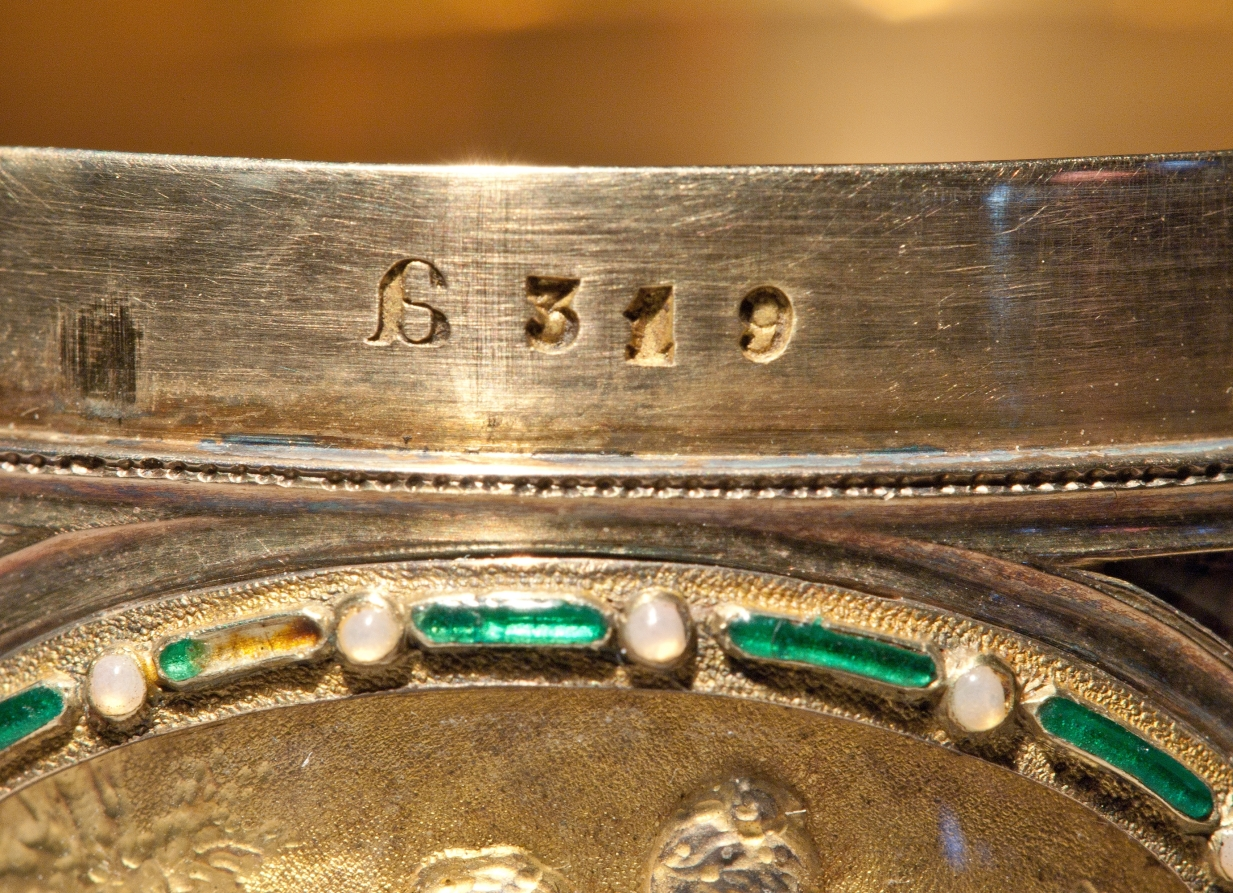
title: Snuff Box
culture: France, Paris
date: c. 1880–1900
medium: gold, enamel, agate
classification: Miscellaneous